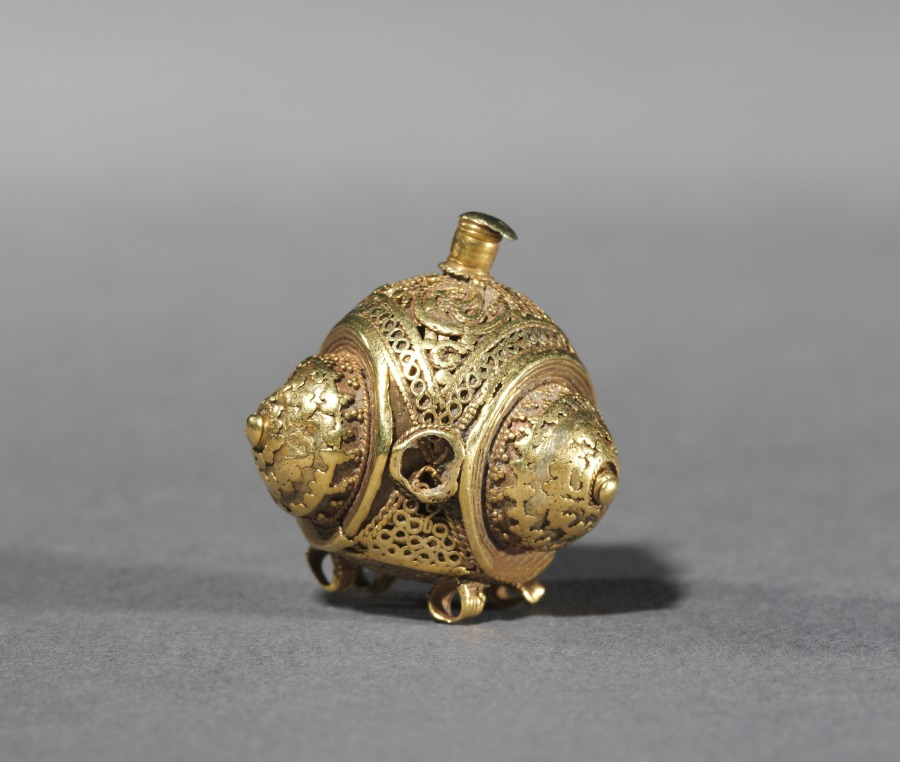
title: Pair of Buttons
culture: Iran, 10th-11th century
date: 900s–1000s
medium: gold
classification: Jewelry